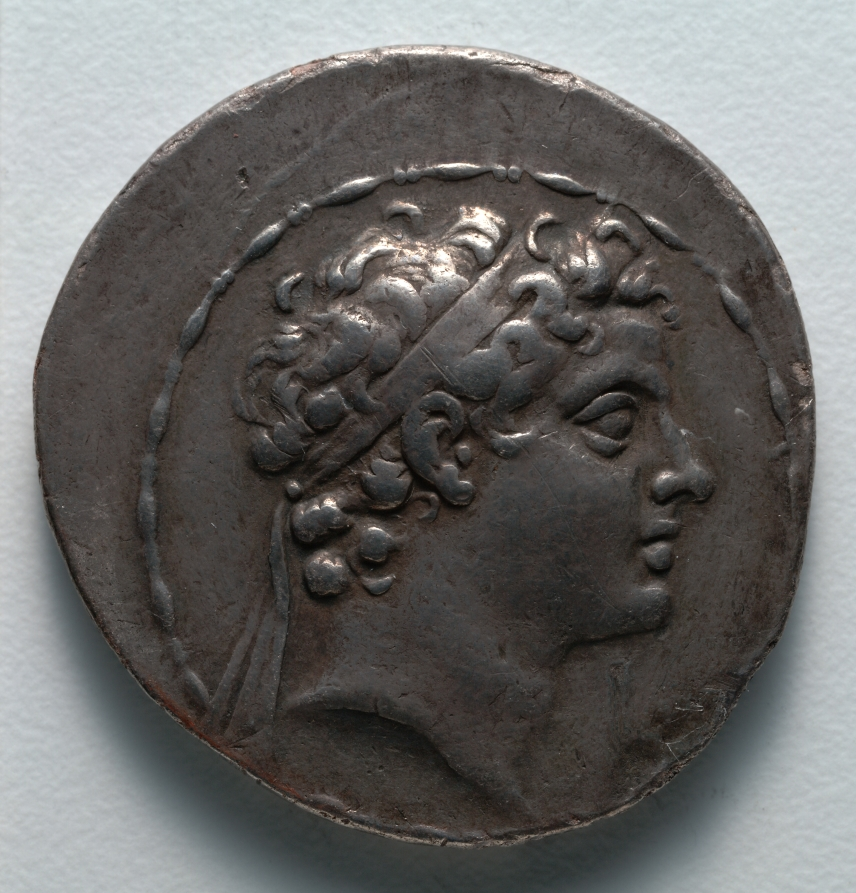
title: Tetradrachm: Head of Antiochos V (obverse)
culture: Greek, Seleukid, minted at Antioch (Syria), reign of Antiochos V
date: 164–162 BCE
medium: silver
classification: Coins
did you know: Antiochos V’s boyish portrait reflects his accession to the Seleucid throne at 9 years of age.